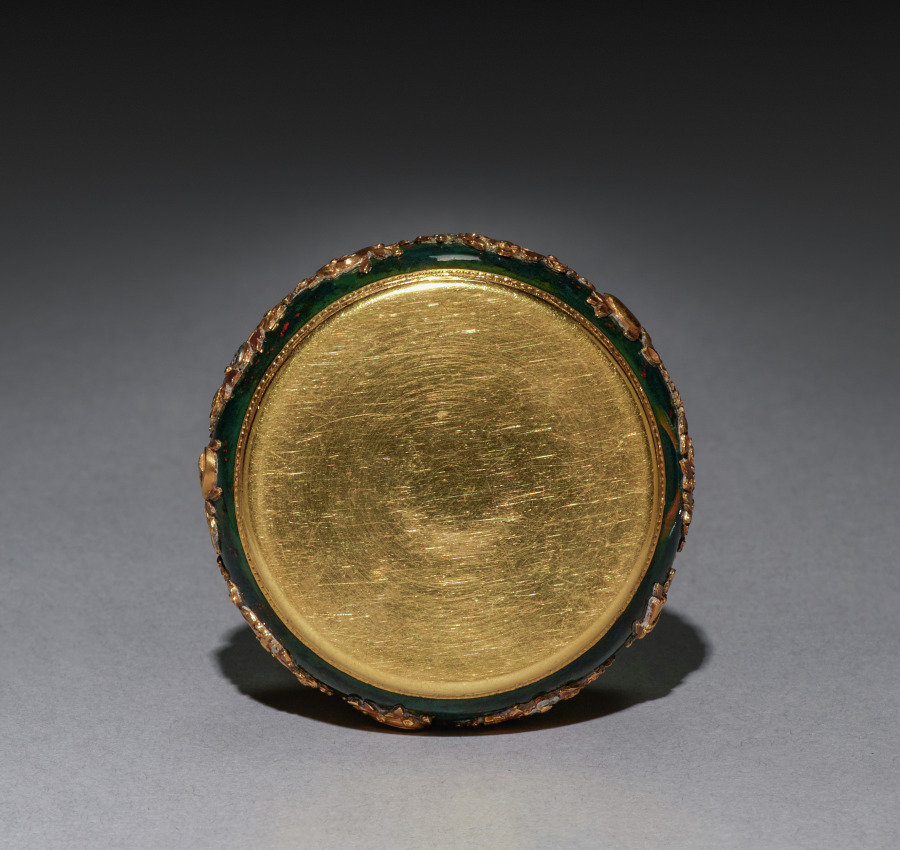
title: Bonbonniere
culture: France, 19th century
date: 1850–1899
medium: bloodstone (?) mounted in colored golds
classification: Miscellaneous